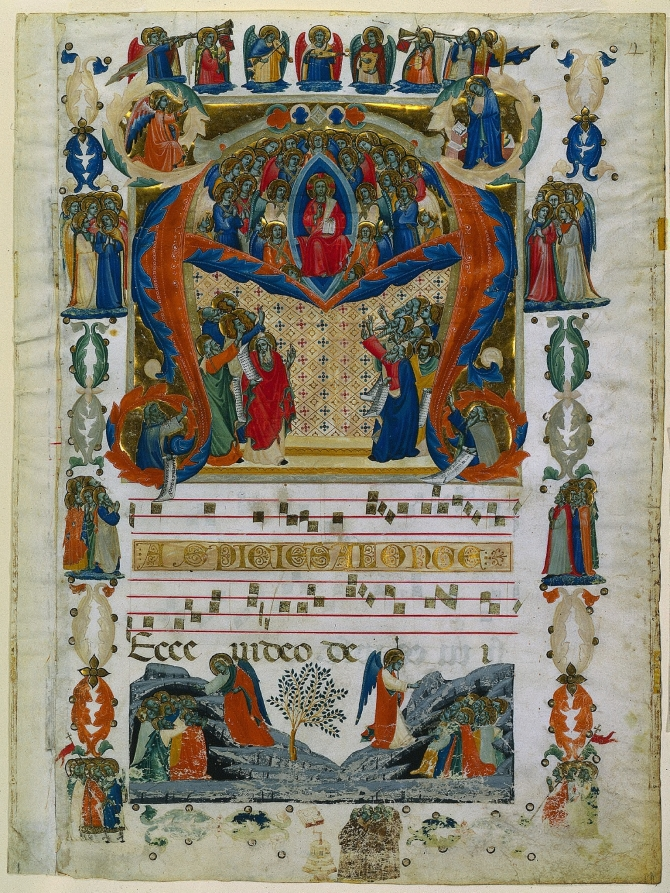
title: Single Leaf Excised from an Antiphonary: Inital A[spiciens a longe] with Christ in Majesty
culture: Italy, Tuscany or Umbria, 14th century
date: c. 1330–1350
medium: ink, tempera, and gold on vellum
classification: Manuscript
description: This massive historiated initial A, among the largest painted by Renaissance illuminators, introduces the matins response for the first Sunday in Advent. For centuries this particular Sunday was known as Aspiciens a longe Sunday, since this is the very first chant of the Christian liturgical year to be sung with a special choir, or Schola Cantorum, on that day. The text as well as the image follow the prophecy of Isaiah who foresaw the birth of Christ: Aspiciens a longe, ecce, video potentiam (Long had I been watching. Behold, now do I see God coming in power as in a cloud of light). Within the letter A, Christ is enthroned in majesty surrounded by angels and saints meant to represent the redeemer who is yet to come. The two figures who occupy the bottom curves of the A are Old Testament prophets; on the left is Isaiah who holds a scroll revealing his prophecy: “Behold, a Virgin can conceive.”